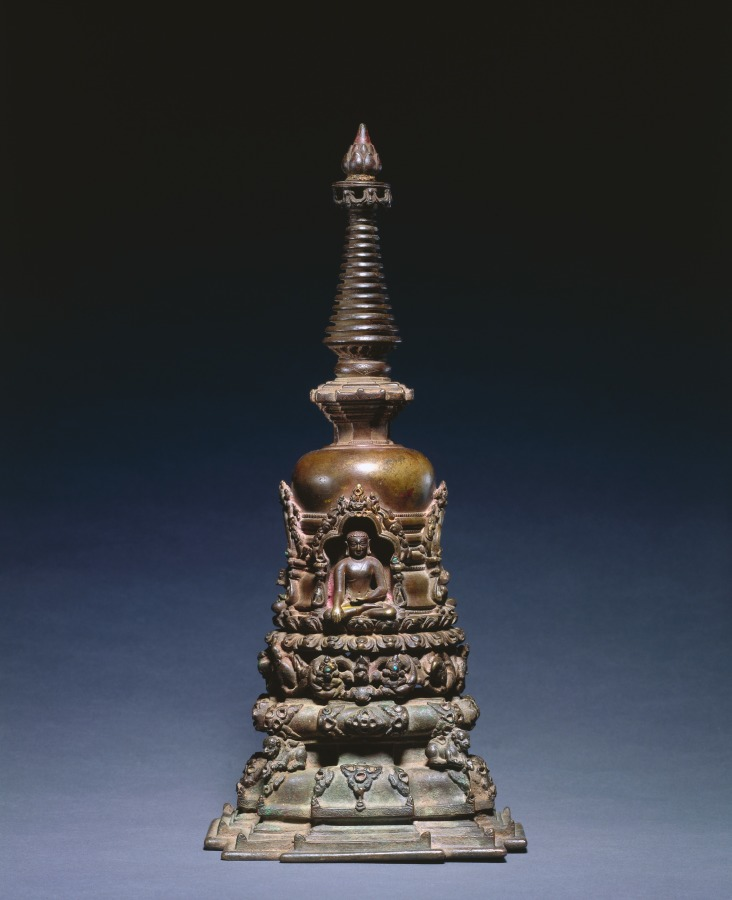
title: Miniature Votive Stupa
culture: Eastern India, Bihar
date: c. 1000s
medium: bronze with inlay of semiprecious stones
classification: Sculpture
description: Small-scale stupas were modeled on large monuments that contain relics of the Buddha or revered members of the Buddhist community within the solid, dome segment. Such models were made to commemorate a devotional visit to the monument. Four different sacred Buddhist images face each of the four directions: Shakyamuni, Vajrasattva, Maitreya, and Prajnaparamita.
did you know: The spire consists of thirteen disk-like parasols that refer to the thirteen stages on the path to enlightenment.